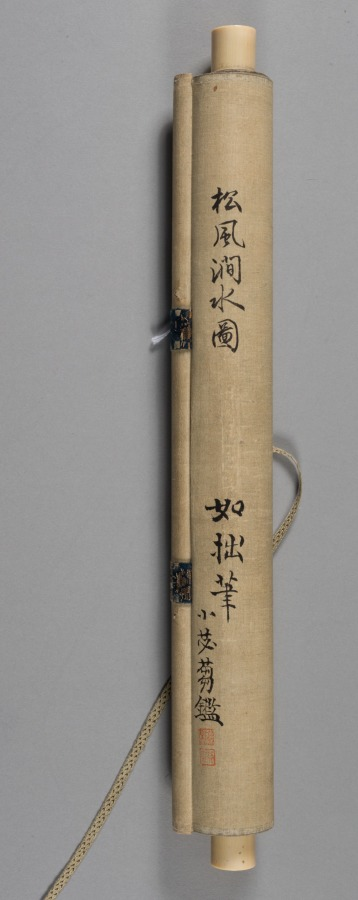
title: Landscape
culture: Japan, possibly Edo period (1615-1868)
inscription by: copy after Ishō Tokugan (Japanese, c. 1359–1437)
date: early 1600s to mid-1800s?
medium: hanging scroll; ink and slight color on paper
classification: Painting